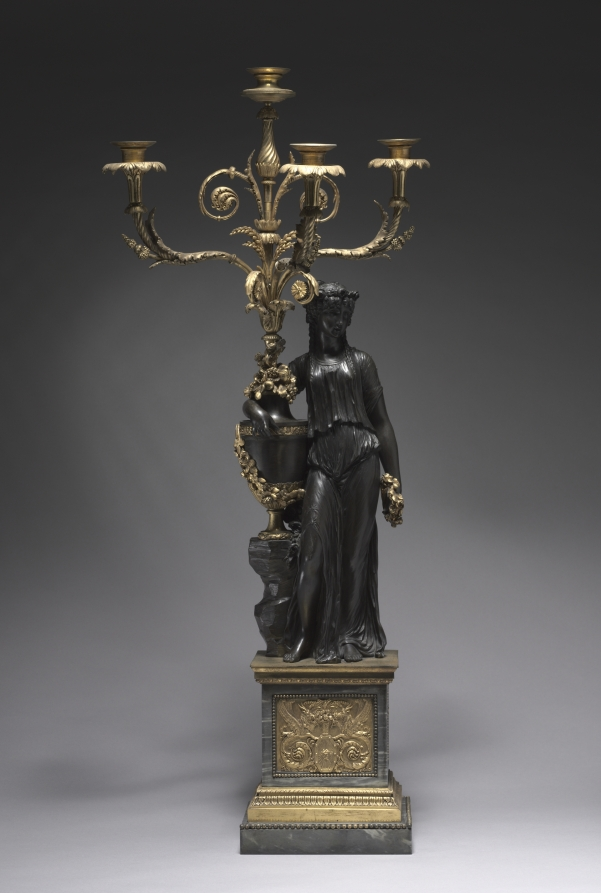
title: Candelabrum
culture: France, 18th century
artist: attributed to Pierre Philippe Thomire (French, 1751–1843)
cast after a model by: Clodion (French, 1738–1814)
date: c. 1780–1785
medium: bronze, gilt bronze, gray marble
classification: Sculpture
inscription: signed behind rock: CLODION.